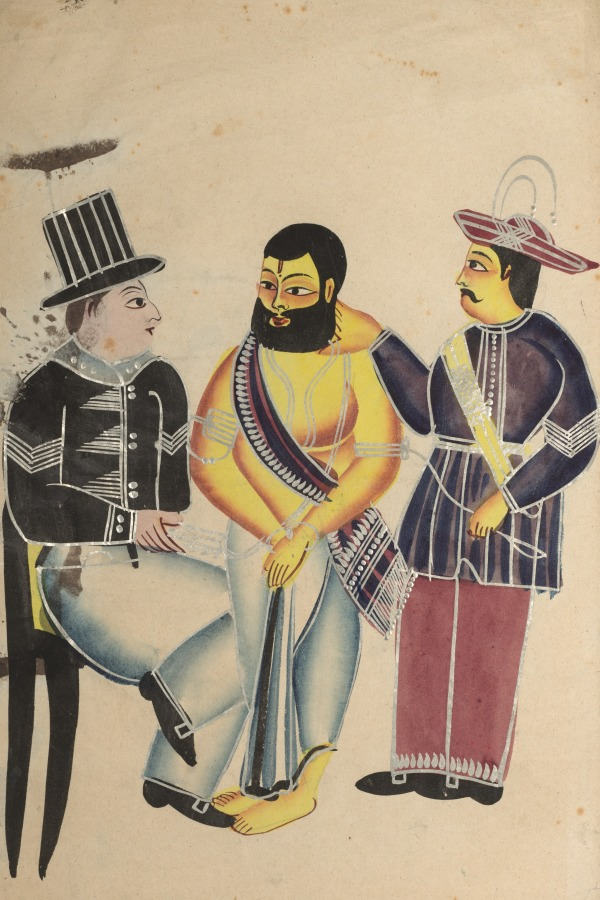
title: Jailer Receiving the Mahant of Tarakeshwar in Prison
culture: Eastern India, Bengal, Kolkata, Kalighat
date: c. 1890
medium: Black ink, gum tempera, and tin paint, with graphite underdrawing on paper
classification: Painting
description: The Tarakeshwar murder case of 1873 was a public scandal in Calcutta (now Kolkata). It concerned an affair between Elokeshi, a young wife, and the chief priest of the Shiva temple at Tarakeshwar. Having learned about the affair, her jealous husband cut Elokeshi’s throat with a fish knife on May 27, 1873. In the subsequent trial, the husband, Banerji, was sentenced to life imprisonment and the priest was fined and imprisoned for three years. Several Bengali plays and Kalighat images were inspired by this affair and depicted events that did not actually occur but were imagined by the artist. Here the adulterer, the Mahant (head priest), is depicted roped to an Indian jailer and presented to an English (or Anglo-Indian) warden. The warden sits in a black chair, wearing an English top hat and holding in his right hand the Mahant’s warrant of commitment for adultery. Both the warden and jailer wear British-styled buckled shoes.